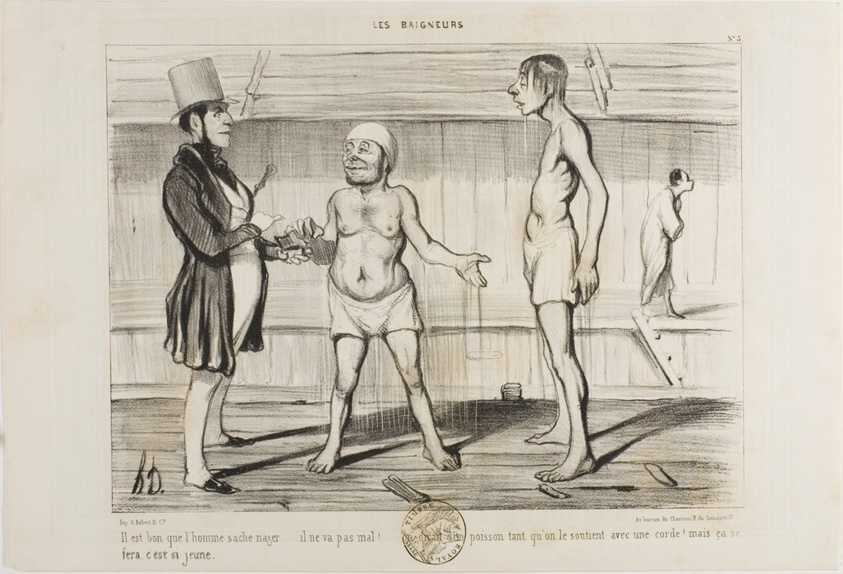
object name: Print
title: “It's important for a man to know how to swim. He is not doing so badly for a start. You could think it's a fish, at least while he is attached to the cord. But he'll learn it… he is still young!,” plate 5 from Les Baigneurs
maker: Honoré Victorin Daumier; French, 1808-1879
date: 1839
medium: Lithograph in black, with scraping on stone on ivory wove paper, with letterpress verso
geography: France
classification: lithograph; print; prints and drawing